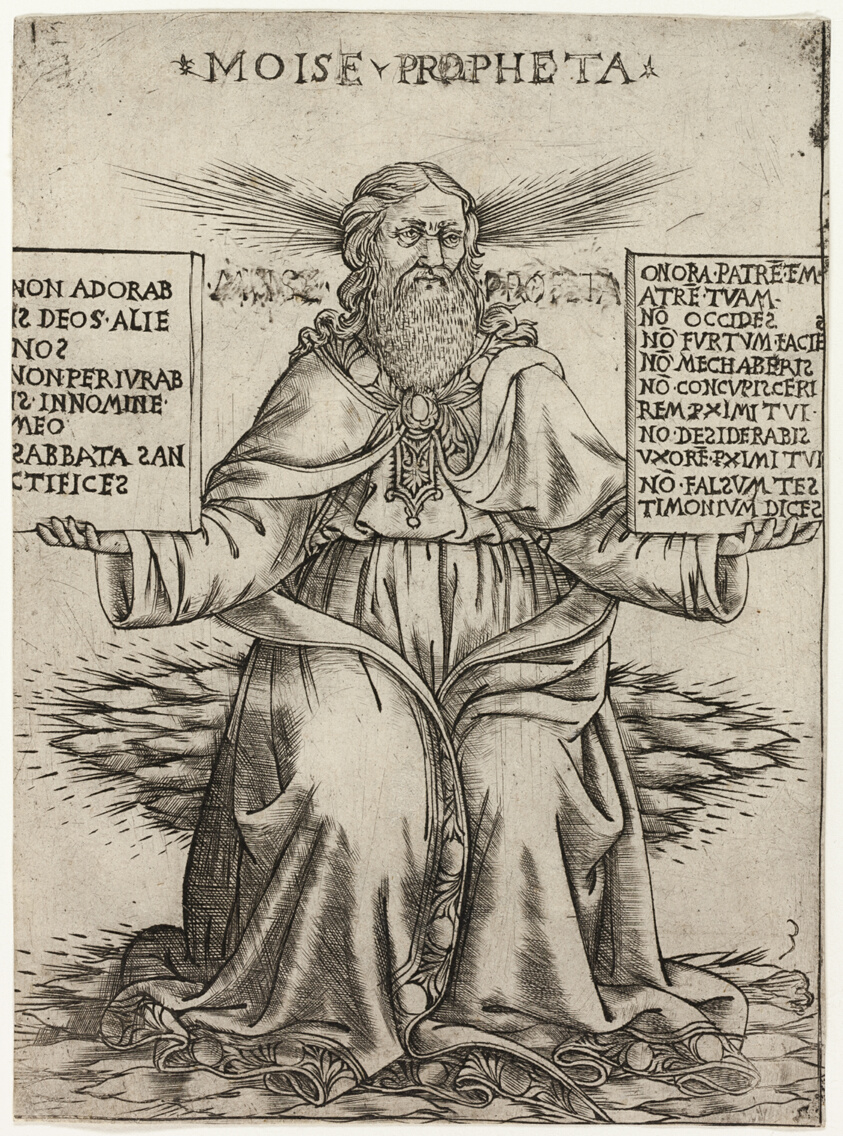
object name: Print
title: The Prophet Moses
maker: Attributed to Baccio Baldini; Italian, c. 1436-1487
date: c. 1470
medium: Engraving printed in gray-black on ivory laid paper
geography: Italy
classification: engraving; print; prints and drawing